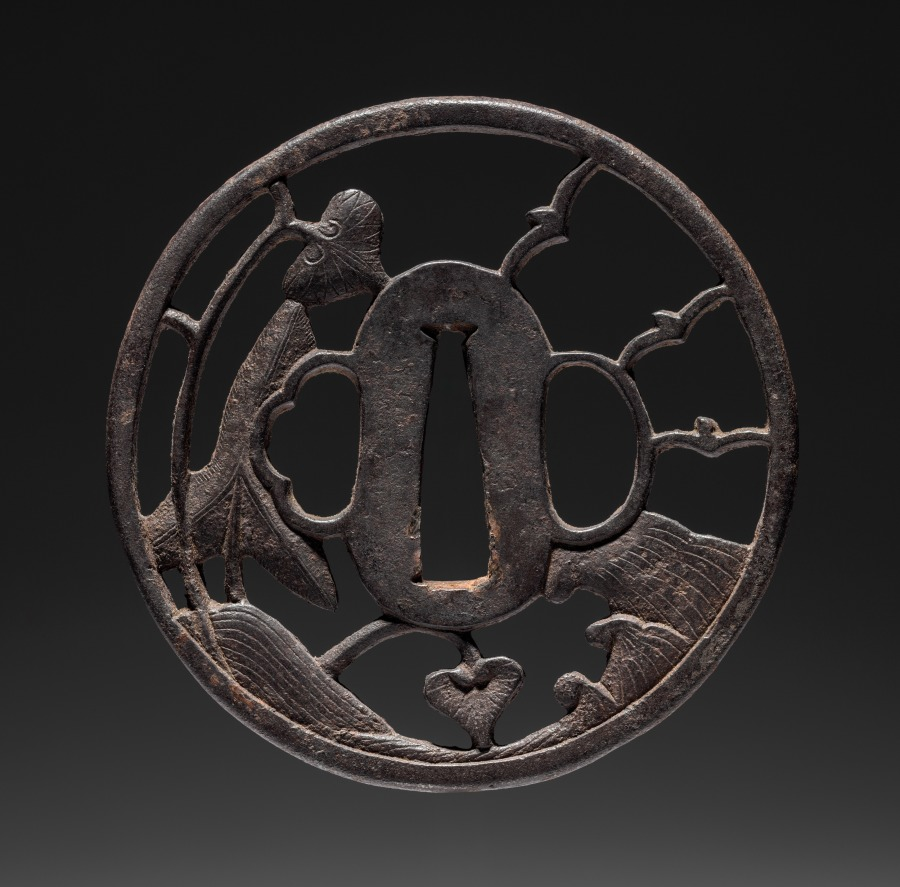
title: Sword Guard (Tsuba)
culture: Japan, possibly Edo period (1615–1868)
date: c. 1615–1868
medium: metal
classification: Arms and Armor